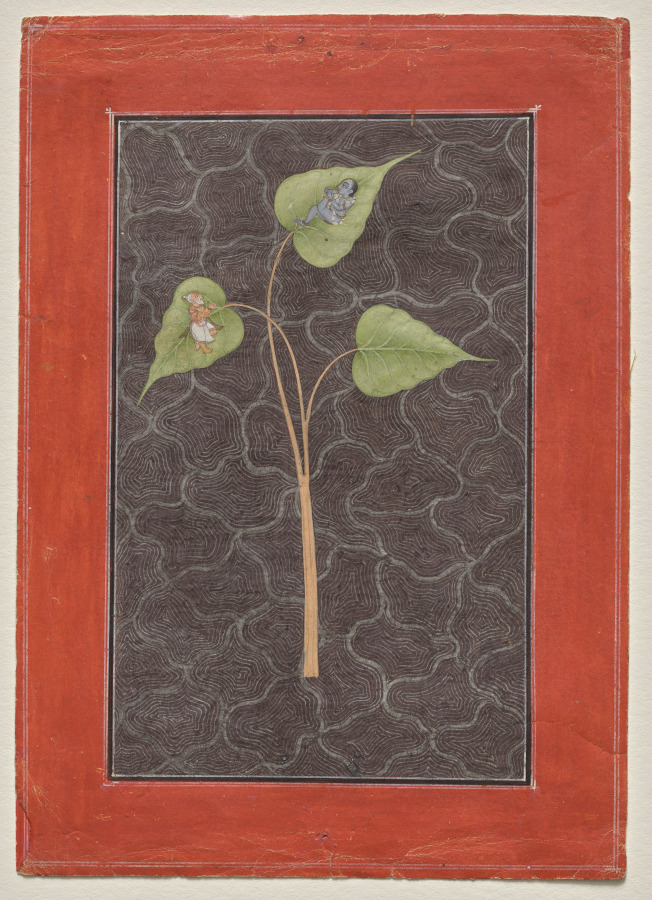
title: Markandeya Viewing Krishna in the Cosmic Ocean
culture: Northern India, Jammu and Kashmir, Pahari Kingdom of Basohli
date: c. 1680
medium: Gum tempera on paper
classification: Painting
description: The anonymous court artist from a Hindu kingdom in the foothills of the Himalaya mountains has chosen a web of concentric abstract shapes to represent the cosmic ocean as the backdrop for this elegant, striking composition. The sage Markandeya received the dubious gift of immortality, so even after the destruction and dissolution of the world and all its creatures, he must carry on exhausted and alone through the cosmic ocean until the next world cycle begins. At one point in the darkness he saw a branch from a banyan tree floating on the ocean’s surface, and with awe he saw the infant Krishna on one leaf, sucking his toe. When Markandeya looked into his mouth, he saw the entire universe as it was and as it will be. This story and imagery shows that with the destruction of the universe comes the infancy of evolution, and creation will begin anew.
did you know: Sherman E. Lee, who was the director of the Cleveland Museum of Art from 1958 until 1983, and his wife Ruth donated this painting.